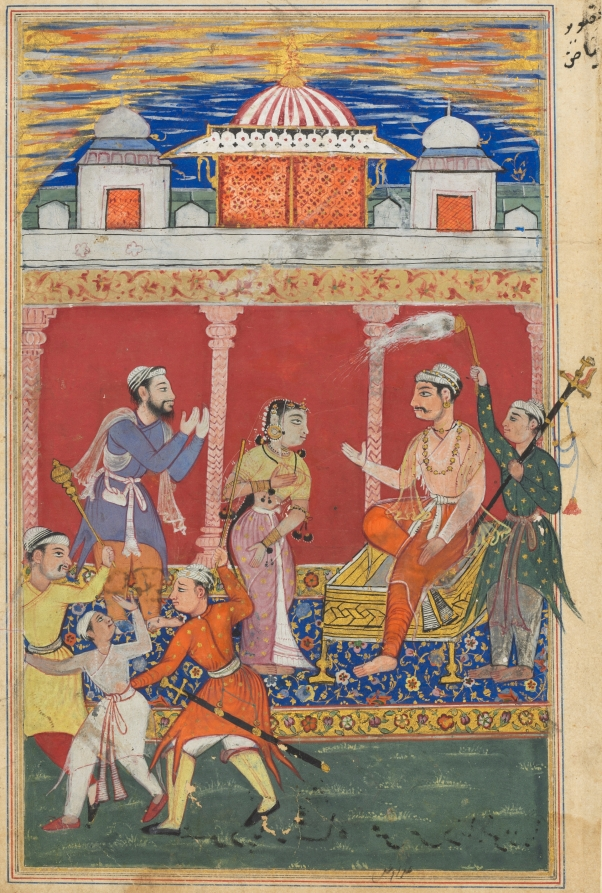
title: The prince’s ordeal continues, he is ordered away to be executed for the fifth time, from a Tuti-nama (Tales of a Parrot): Eighth Night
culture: Mughal India, court of Akbar (reigned 1556–1605)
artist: Ghulam 'Ali (Indian, active 1550s-1590s)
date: c. 1560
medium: gum tempera, ink, and gold on paper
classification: Painting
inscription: ghulām 'alī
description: The deceptive handmaiden appeals her case to the enthroned king, falsely claiming that the young prince has assaulted her. The prince, dressed in white, is taken away by two armed guards to be executed.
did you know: Works attributed to the artist Ghulam ‘Ali are found in only one other known manuscript.